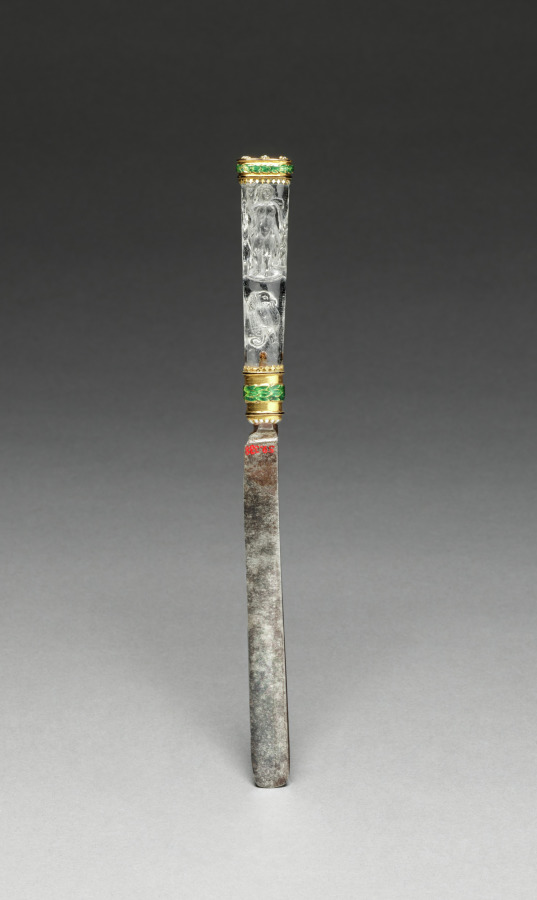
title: Knife and Fork with Sheath (Knife)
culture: Italy, Venice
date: late 1500s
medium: gold, enamel, crystal, steel, leather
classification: Enamel